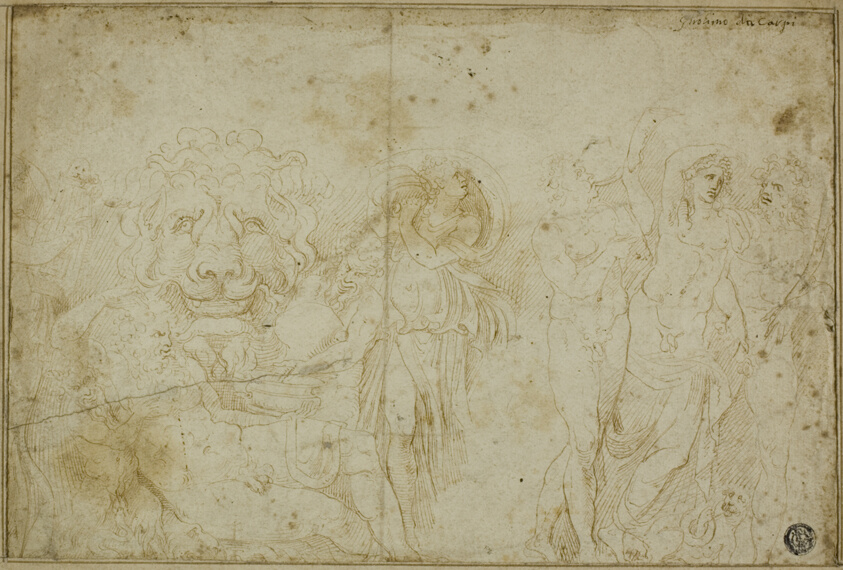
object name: Drawing and Watercolor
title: Blenheim Palace Sarcophagus: Bacchanale with Lion's Head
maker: Girolamo Sellari, called Girolamo da Carpi; Italian, 1501-1556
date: 1549/53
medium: Pen and brown ink on ivory laid paper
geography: Italy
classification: pen and ink drawings; drawings (visual works); prints and drawing